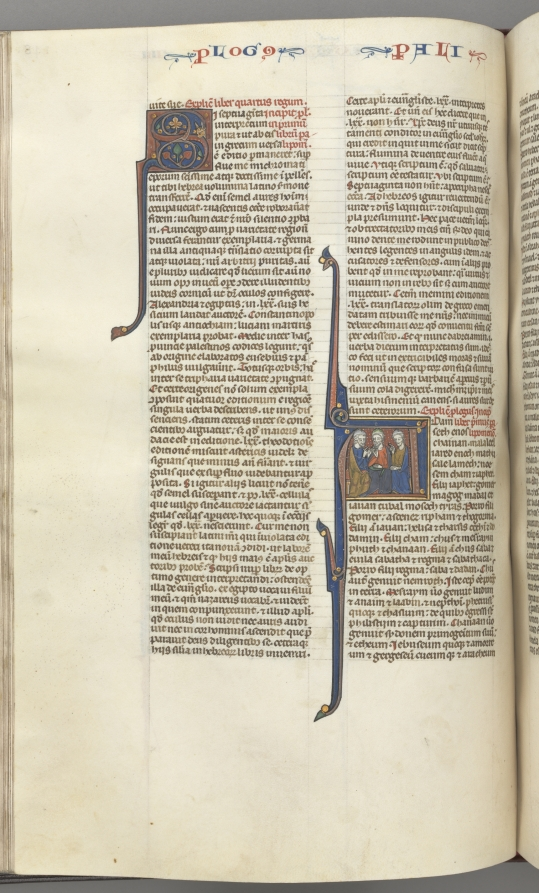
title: Fol. 148v, Chronicles I, historiated initial A, three descendants of Adam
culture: Southern France, Toulouse(?), 13th century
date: c. 1275–1300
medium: ink, tempera and gold on vellum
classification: Bound Volume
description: Biblical manuscripts were highly prized and important possessions of churches, monasteries, cathedral schools, and universities throughout medieval Europe. The biblical texts were known as the vulgate, the translations made by Saint Jerome in the fourth century from Hebrew and Greek into Latin, which became the definitive and official Latin version of the Roman Church. In the 13th century, the bible was, for the first time, produced as a single volume with an officially sanctioned sequence to its books and chapters as illustrated by this example. The very extensive decoration of this bible is arranged hierarchically to indicate the relative importance of the various texts so that full or almost full-page initials mark the openings of the first prologue, Genesis, and the first Gospel; historiated initials mark the beginning of each book and illuminated initials mark the Prologues.